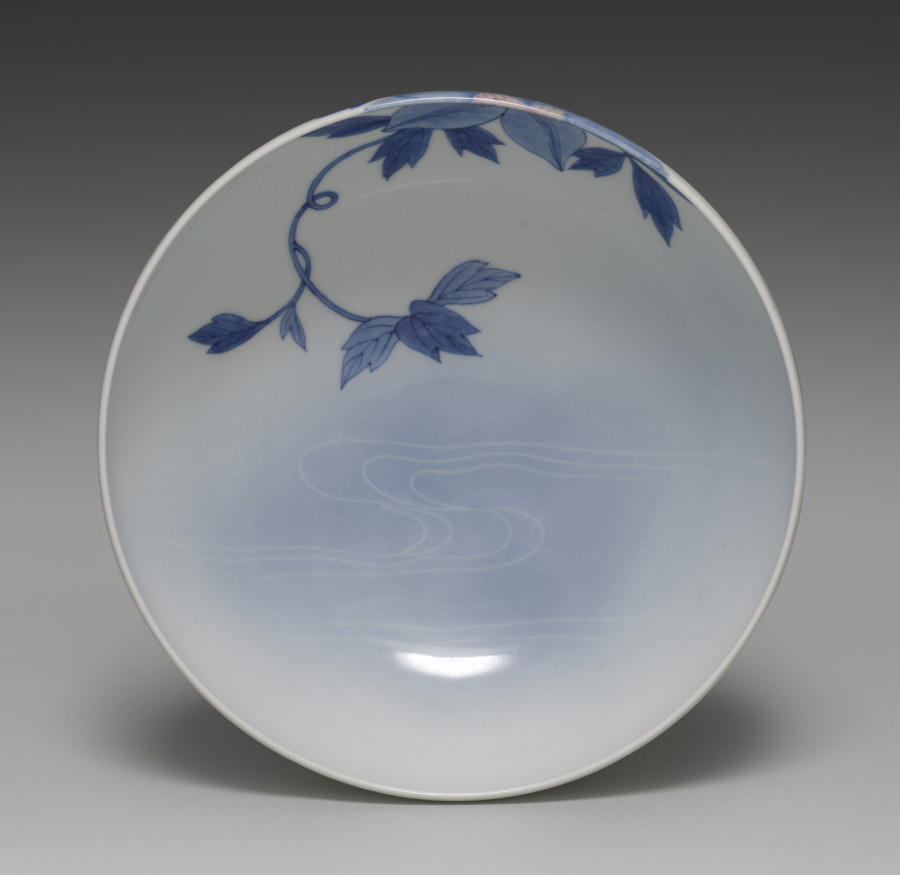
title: Dining Bowl with Clematis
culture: Japan, Meiji period (1868–1912)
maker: Seifū Yohei III (Japanese, 1851–1914)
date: 1893–97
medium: Porcelain with underglaze and overglaze colors, molded and incised designs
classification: Ceramic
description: The bowl is an especially well-executed example of Yohei III’s work in underglaze blue combined with other underglaze colors. This low-profile dining bowl has paintings of flowering clematis vines under the glaze in blue and red. Water is depicted with blue in the bottom of the bowl. The lines of white used to show motion on the water’s surface were created using either a reserve technique, where blue was omitted, or a masking technique, where parts of the surface were covered before applying the blue. A pair of butterflies flutters across one side. The foot is decorated with a pattern of spirals in blue, and the lip curves in slightly. The overall effect is one of seeing the flowering vine hanging down, hovering just above the surface of a pond, whose slight disturbances hint at unseen fish swimming below.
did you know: This bowl shows an environment painted in the round.